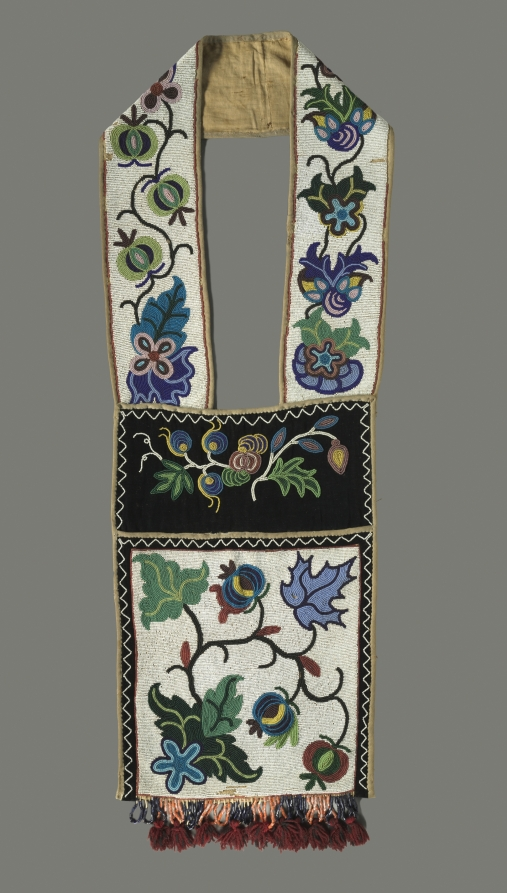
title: Bandolier (Shoulder) Bag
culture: Northeastern Woodlands, Great Lakes Region, Anishinaabe (Ojibwe) People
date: 1880s?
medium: plain weave cotton, twill weave wool, velvet, plaited wool binding, wool tassels, glass beads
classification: Textile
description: Inspired perhaps by British ammunition pouches, bandolier bags evolved from smaller native bags to become one of the flashiest, most important items of Woodlands formal attire during the 1800s. Europeans introduced floral motifs to Woodlands imagery, but artists’ enthusiastic response suggests the motifs struck a chord in native thought, which holds plants to be animate and powerful. This example features blueberries, literally “soul food” that refreshes the spirit of the living and the dead, and alludes to new seasonal growth.